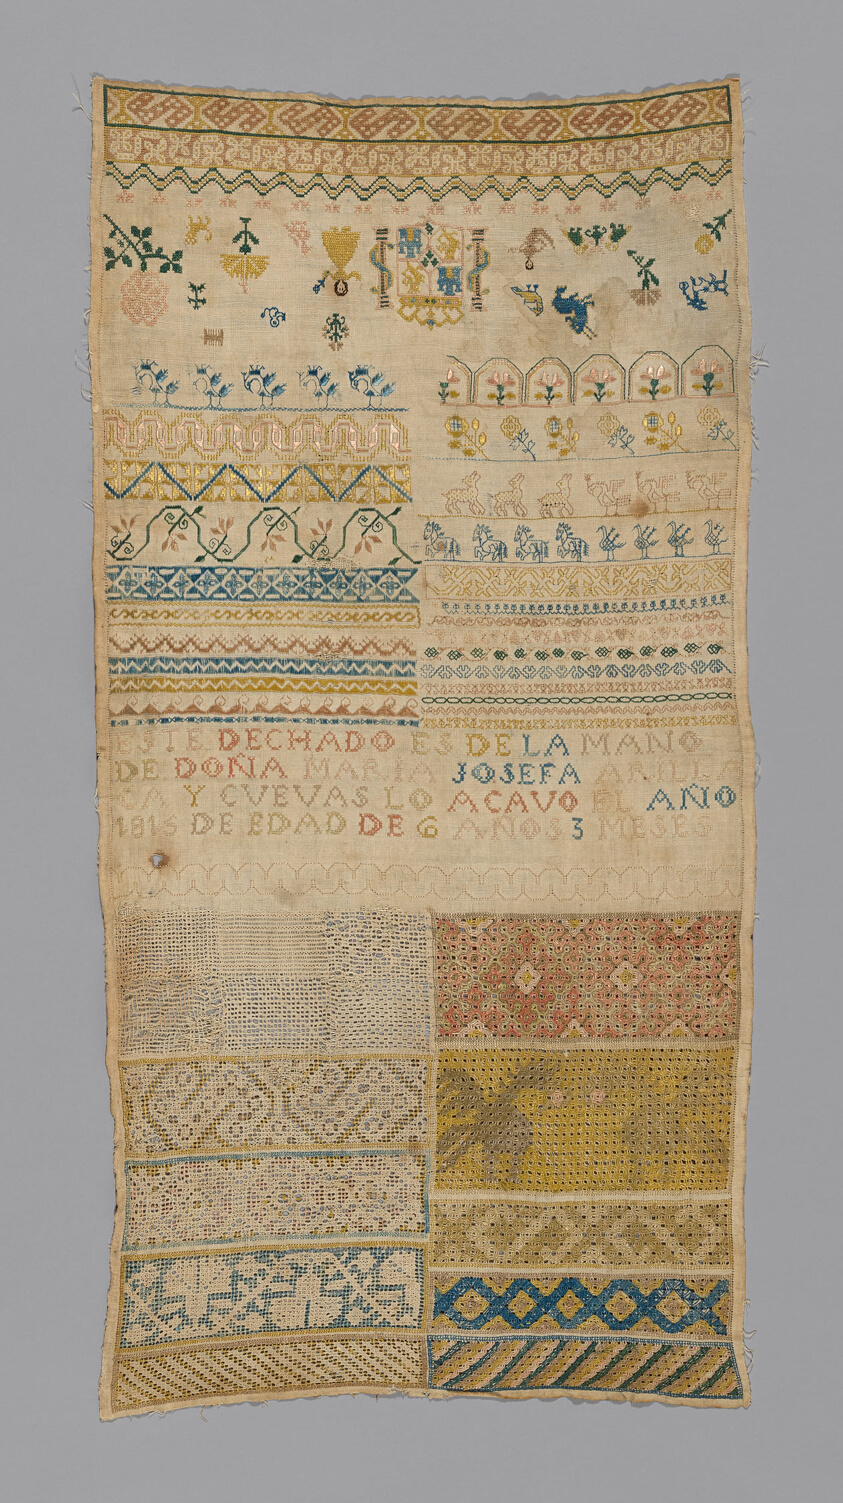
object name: Textile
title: Sampler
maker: Spain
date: 1815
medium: Linen, plain weave; pulled thread work; embroidered with silk floss and linen yarns, in black, double faggot, hem interlocking, loop, overcast, Russian overcast, and wave stitches; embroidered with silk floss in back, cross, double running, long-armed cross, satin and stem stitches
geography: Spain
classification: textile; needlework (visual works); sampler